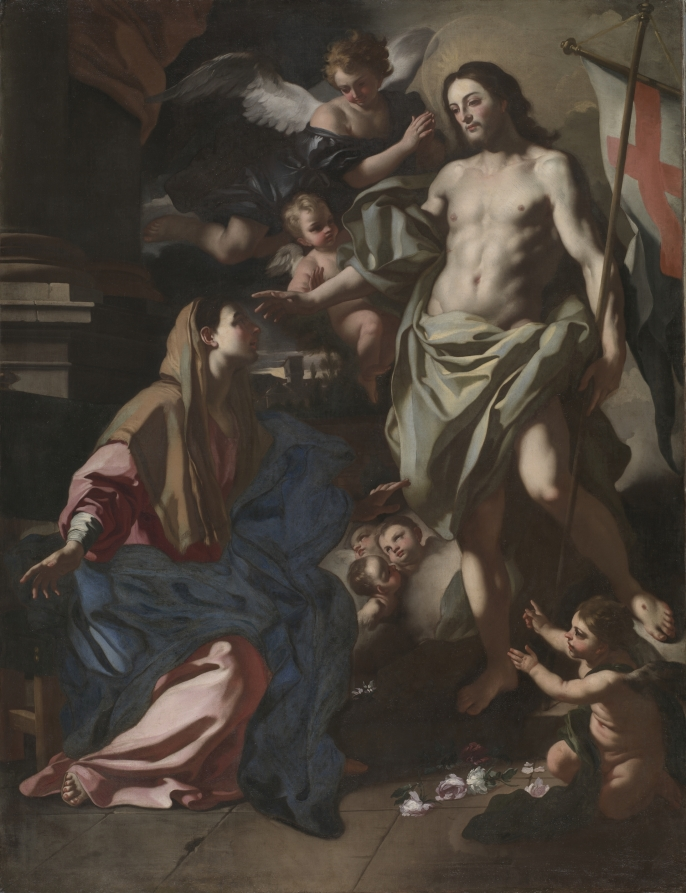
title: The Risen Christ Appearing to the Virgin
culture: Italy, 18th century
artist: Francesco Solimena (Italian, 1657–1747)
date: c. 1708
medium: oil on canvas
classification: Painting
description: The dramatic contrasts of light and dark reveal the long aftereffects of Caravaggio in Naples. Yet, the elegant forms, rich colors, and perfected body of Christ have far more affinities with the idealizing strand of Italian art in the 1600s and 1700s. Solimena sought to improve on nature, based on the study of antiquity, aiming to create a work of grandeur and nobility meant to inspire reverence and devotion appropriate to the holy subject.